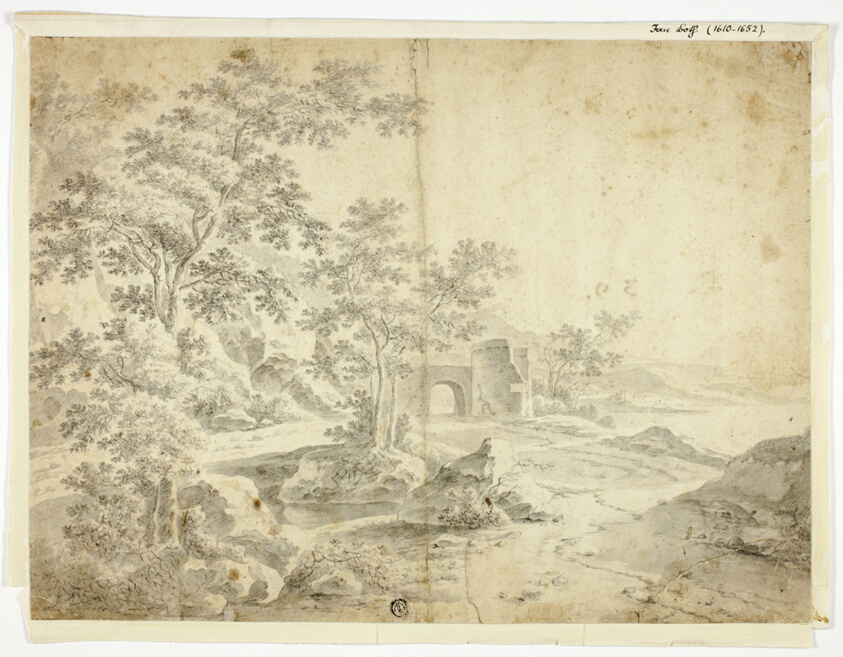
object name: Drawing and Watercolor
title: Landscape with Ruin by Water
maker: Possibly a follower of Jan Both; Dutch, c. 1618-1652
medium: Black chalk, with brush and gray wash, on buff laid paper, laid down on ivory laid paper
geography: Holland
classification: ink or chalk wash; drawings (visual works); prints and drawing